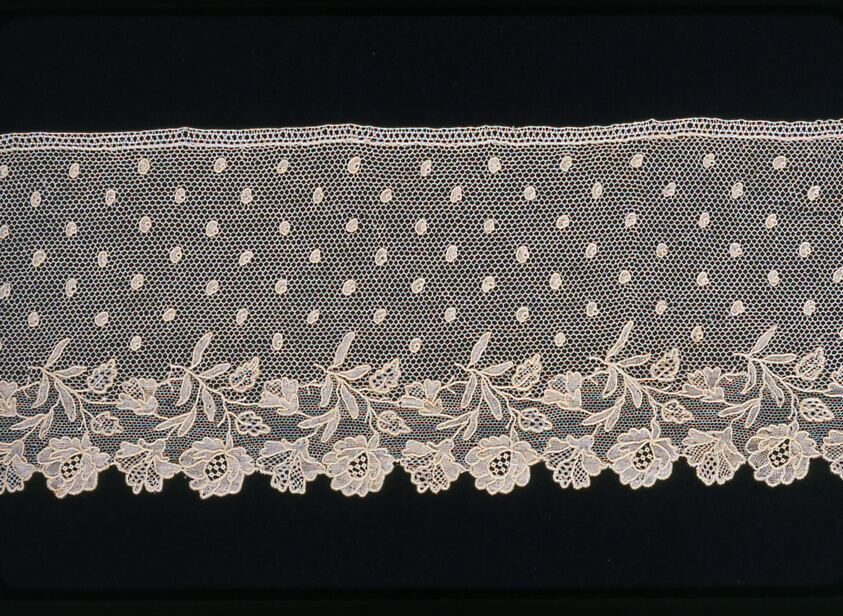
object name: Textile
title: Border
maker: France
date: 1820s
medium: Linen and horsehair, needle lace of a type known as "Point d'Argentan" with a whipped mesh ground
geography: France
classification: textile; lace - needle